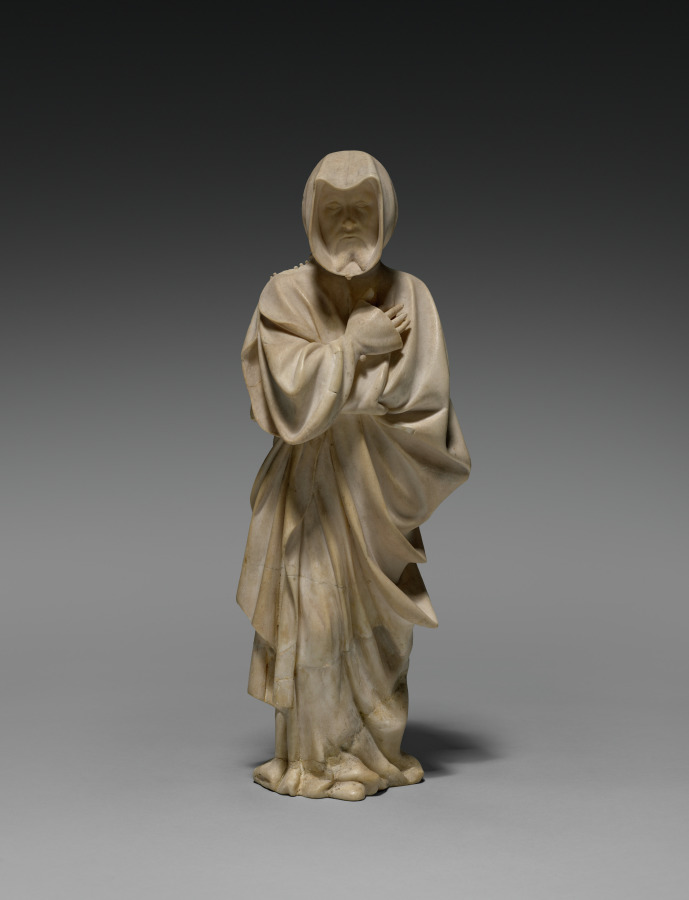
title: Mourner from the Tomb of Philip the Bold, Duke of Burgundy (1364–1404)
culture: Netherlands, active Dijon, 15th century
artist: Claus de Werve (Netherlandish, 1380–1439)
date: 1404–10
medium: vizille alabaster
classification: Sculpture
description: This figure comes from the tomb of Duke Philip the Bold from the church of Champmol near Dijon (Burgundy, France). Philip, who founded the monastery and designated it as his burial place, hired the best artists, many of whom came from the Netherlands. While the commission was given in 1381, the work was not completed until 1410, six years after the duke’s death. This mourner is unusual for the time because it is not carved as a static low relief on the pedestal of the tomb but interacts with the viewers and their fellow procession members. The lifelike quality of the figure is due in large part to the alabaster. Its softness allowed artists to carve details into the material, and the transparent, milky white stone could also be polished to a high gloss.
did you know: A plaster cast of this mourner decorates the empty niche in the Tomb of Philip the Bold in Dijon, France.